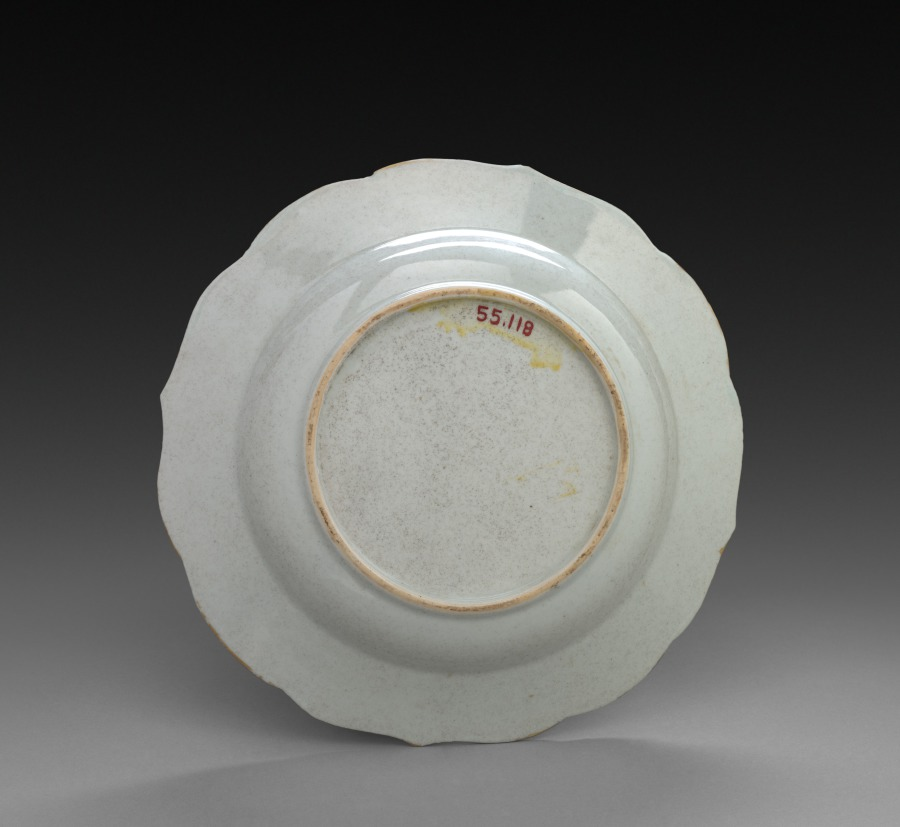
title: Soup Plate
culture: China, Chinese Export, 18th century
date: 1760–1770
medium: porcelain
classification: Ceramic